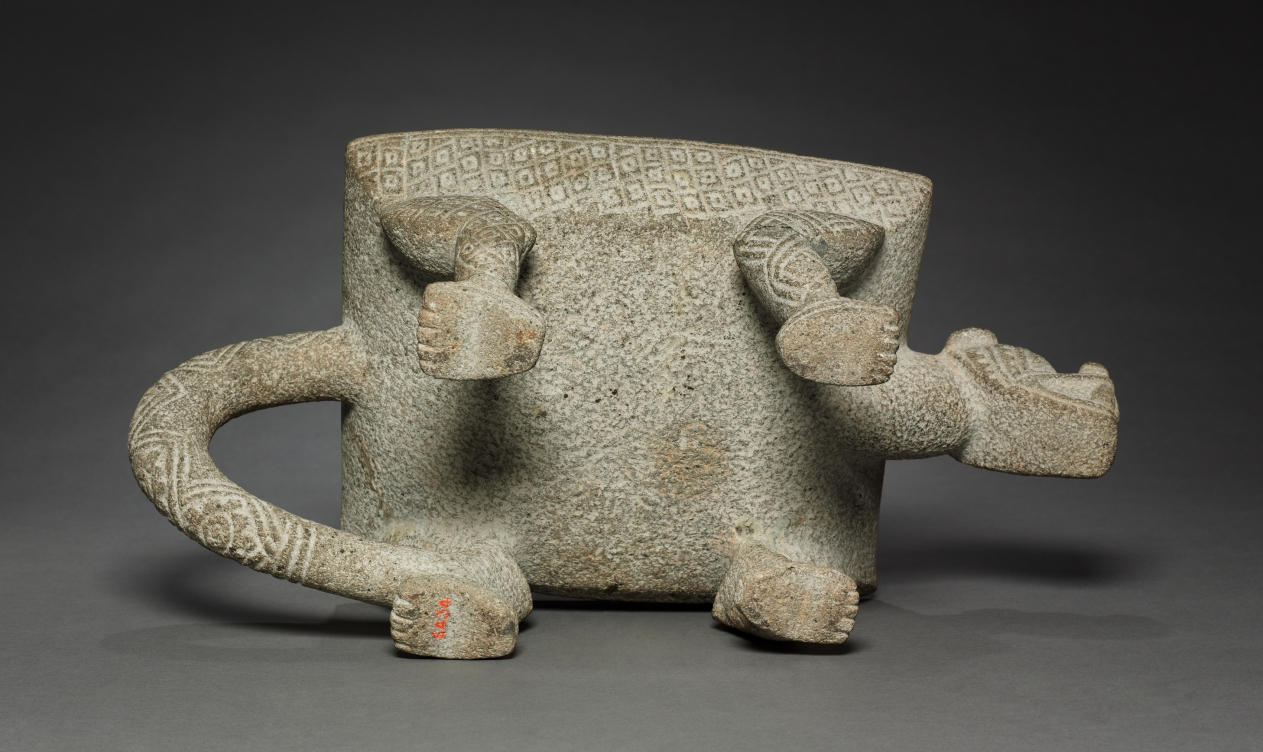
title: Jaguar Grinding Stone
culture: Costa Rica, Atlantic Watershed region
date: c. 1000–1550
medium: stone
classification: Sculpture